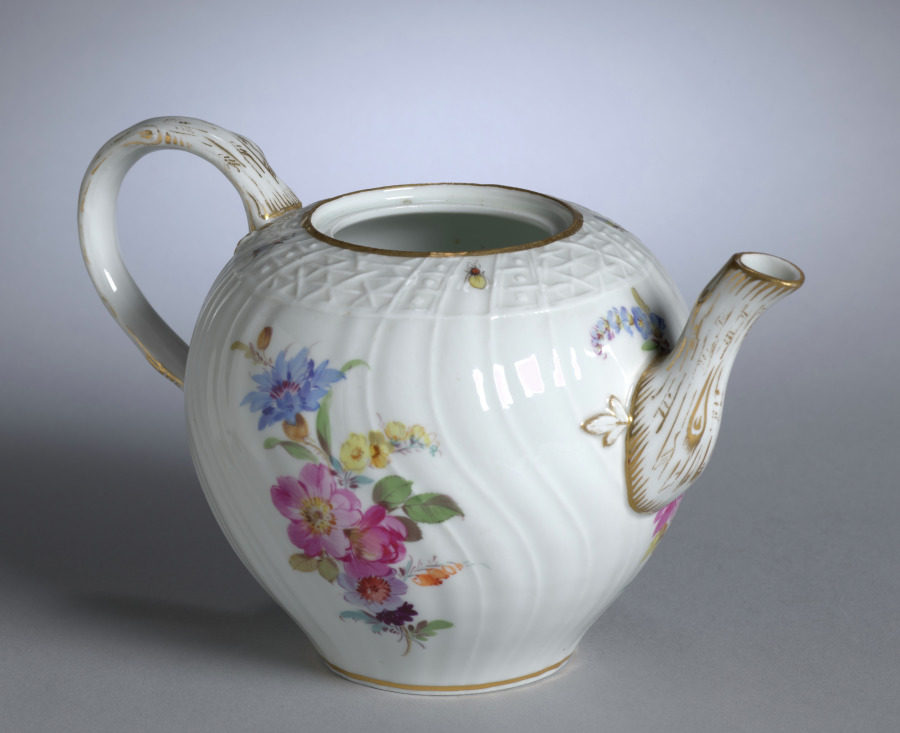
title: Teapot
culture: Germany, Meissen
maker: Meissen Porcelain Factory (German, est. c. 1710)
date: c. 1750–70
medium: porcelain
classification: Ceramic